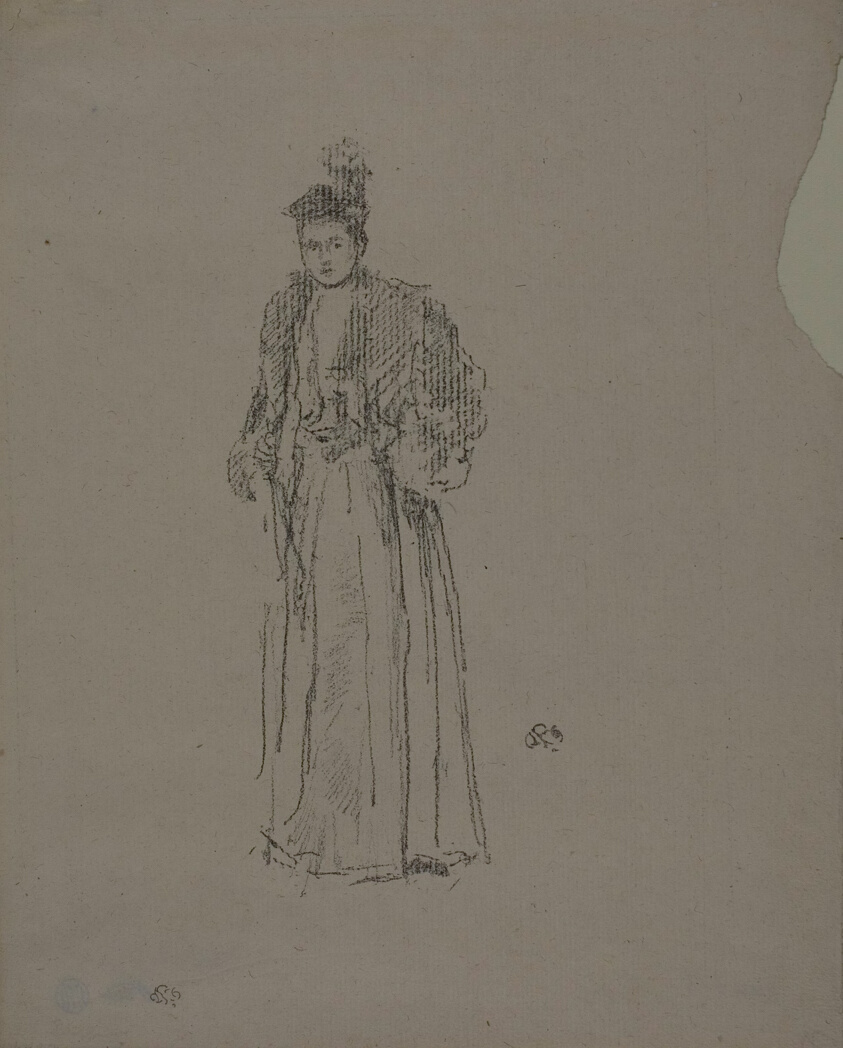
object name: Print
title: Portrait Study: Miss Charlotte R. Williams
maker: James McNeill Whistler (American, 1834-1903)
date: 1892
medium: Transfer lithograph in black on cream laid paper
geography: United States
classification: transfer lithograph; lithograph; print; prints and drawing; paper